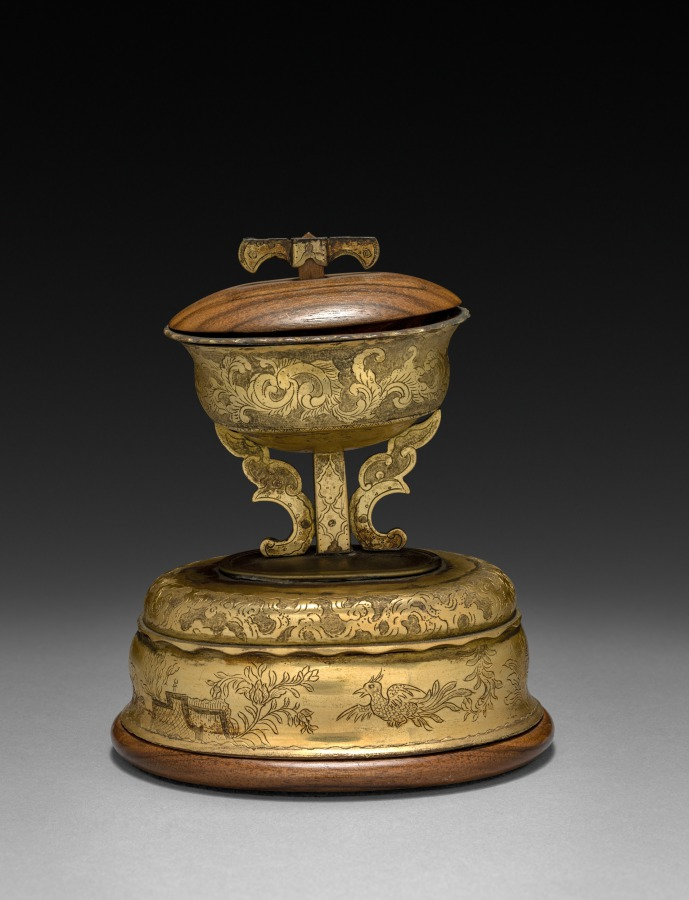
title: Incense Burner (?)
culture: Japan, Kamakura period (1185–1333)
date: 1185–1333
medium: gilt bronze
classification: Metalwork